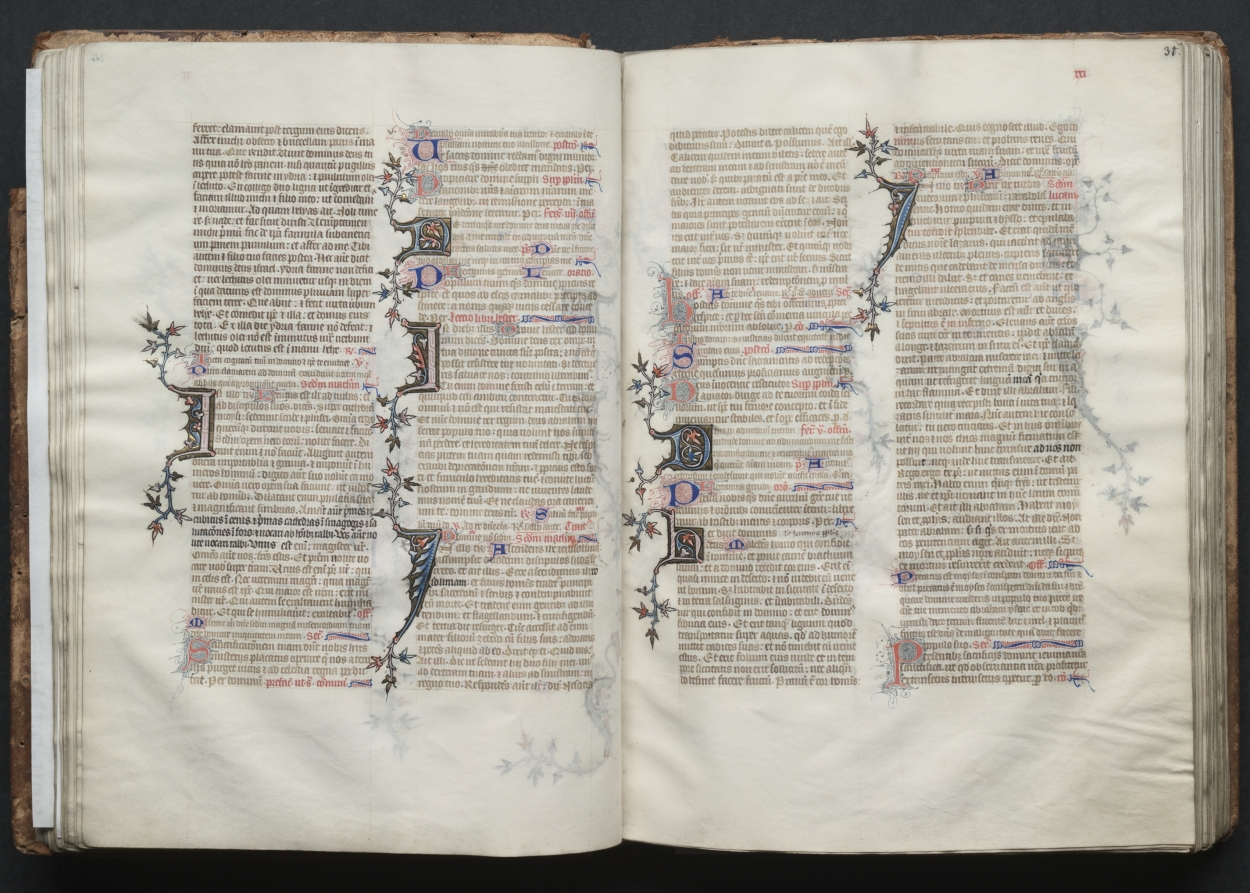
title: The Gotha Missal: Fol. 31r, Text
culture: France, Paris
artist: Master of the Boqueteaux (French)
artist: and Workshop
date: c. 1375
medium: ink, tempera, and gold on vellum; blind-tooled leather binding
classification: Bound Volume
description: The style and quality of this manuscript's decoration is typical of deluxe Parisian books made for aristocratic or royal patrons. Most of the book's decoration appears to be the work of the Master of the Boqueteaux, an artist active at the court of King Charles V (died 1380). His style was apparently shared by a number of book illuminators working in and around Paris. It is very possible that the Gotha Missal belonged to Charles V, but is not provable because the manuscript has no royal portraits and lacks a colophon. Given the book's magnificent decoration, however, it would seem that it was produced for a Valois prince, if not for the king himself. The manuscript receives its name from the German dukes of Gotha, its later owners.